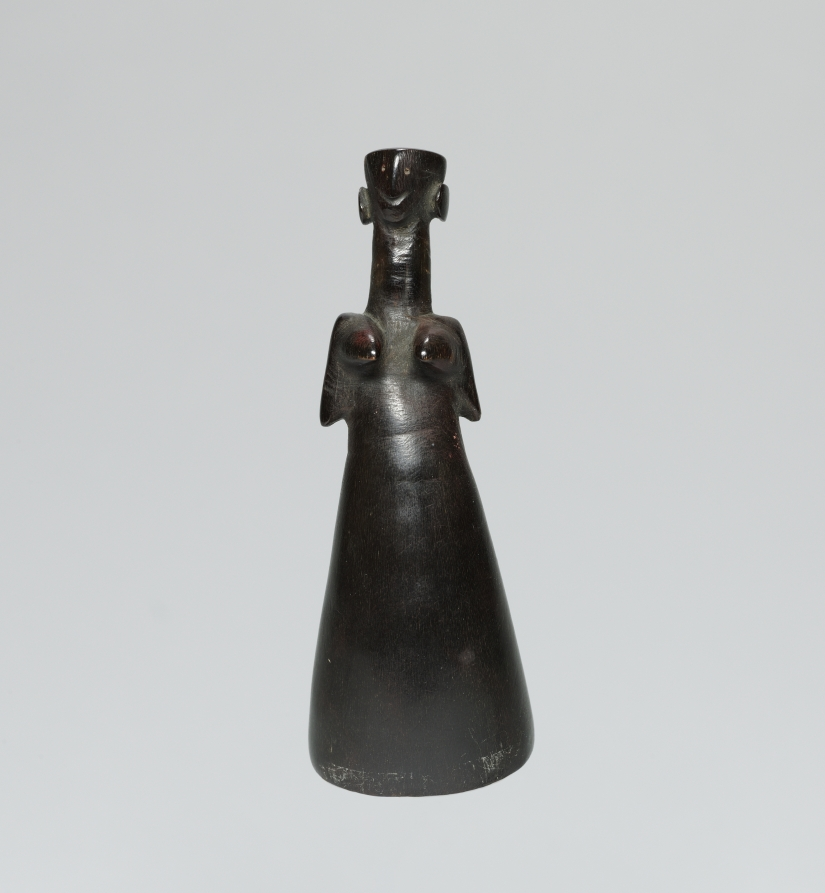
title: Snuff Container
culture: Africa, Southern Africa, Lesotho, South Sotho maker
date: 1800s-1900s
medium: Horn and wood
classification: Vessels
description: This snuff container in the form of a human (female) figure was carved from cattle horn. The form of the image follows the curve of the horn, with arms and hands held to the chest. Despite its smallish size and minimalist execution, this object demonstrates considerable expressive power. Cattle had special meaning for the pastoralist peoples of southern Africa in that it stood for the wealth and status of the individual and the group. However, similar to the ideas associated with tobacco and snuff, cattle also referred to the world of the ancestors. Snuff containers like this one had great significance for their owners and users.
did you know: The tobacco product snuff was stored in decorative, yet useful, containers like this one.